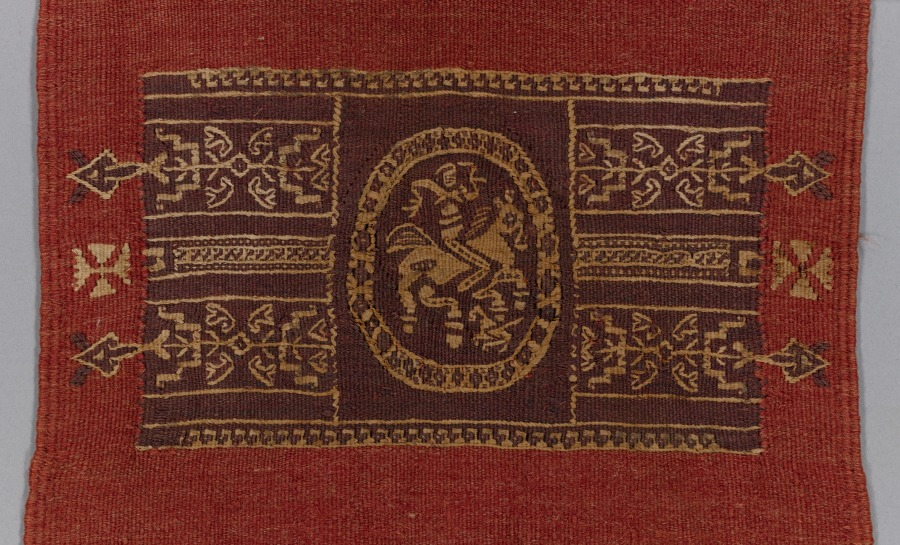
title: Luxurious Woolen Tunic with Decorated Bands and Roundels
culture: Egypt, Umayyad period (661–750)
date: 600s–700s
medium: undyed linen, dyed wool: weft-faced plain weave with slit- and dovetailed-tapestry weave, supplementary weft wrapping, embroidery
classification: Textile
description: Since the mid-200s CE tunics were the main garments worn in Egypt. This unisex tunic is decorated on the front and back with the same geometric and figural motifs, including men on horseback hunting and geometric braided knots that were believed to protect the wearer from harm. A red background was favored in the early Islamic period. Made of thick wool for cooler weather, it was woven in one complete piece with the front, back, and sleeves in this exact shape and size. The tunic’s owner repaired it on the left side and shortened it nearly two inches by sewing a fold around the waist. The discoloration and deterioration indicate the garment may have been used in a burial.